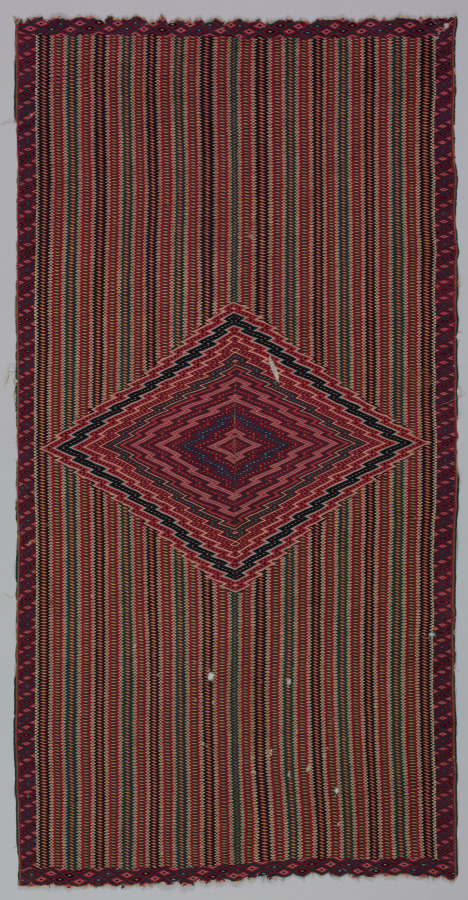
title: Saltillo Sarape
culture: Mexico, Coahuila state, Saltillo Region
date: c. 1820–50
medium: Wool, cotton; tapestry weave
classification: Textile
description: The sarape (wearing blanket) is a classic Mexican men’s garment that became a symbol of national identity and pride after Mexico achieved independence from Spain in 1821. Examples woven between about 1750 and 1875 in Saltillo, a town in northern Mexico, are the sarape’s most famous representatives, prized for their design, color, and technical refinement.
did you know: Saltillo sarapes (wearing blankets) are prized for their design, color, and technical refinement.